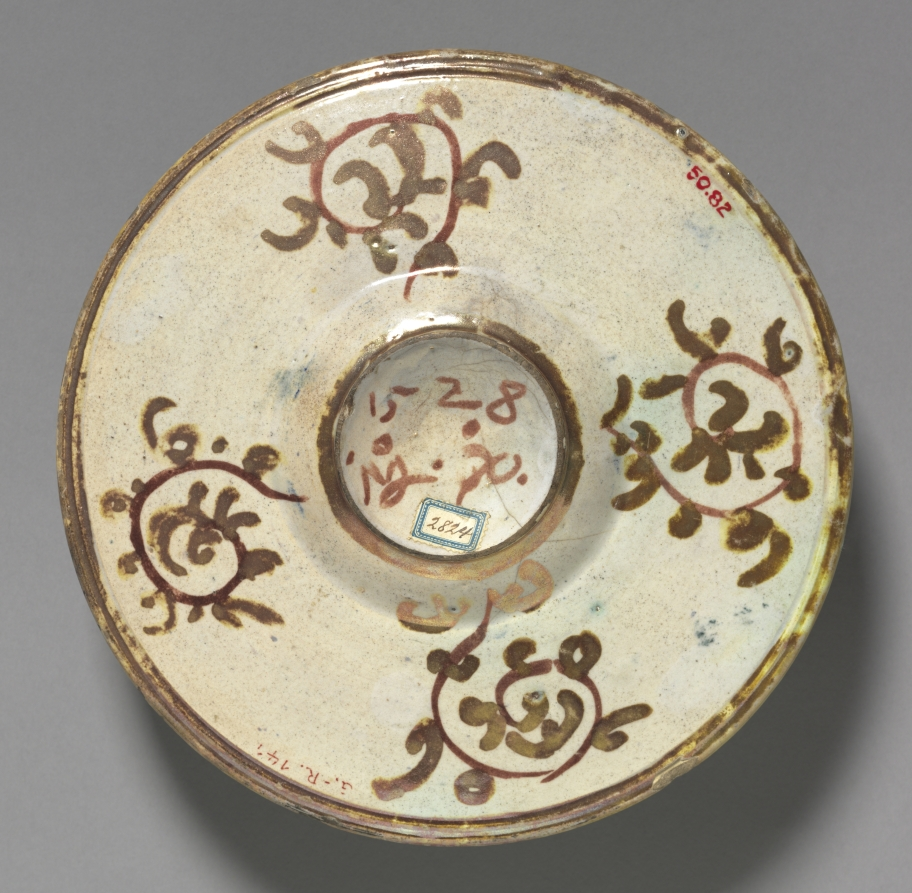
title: Plate: The Prodigal Son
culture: Italy, 16th century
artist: Maestro Giorgio Andreoli (Italian, 1465?–1553)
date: 1528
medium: tin-glazed earthenware with gold and red lustre (maiolica)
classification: Ceramic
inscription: signed: y 1528 x.